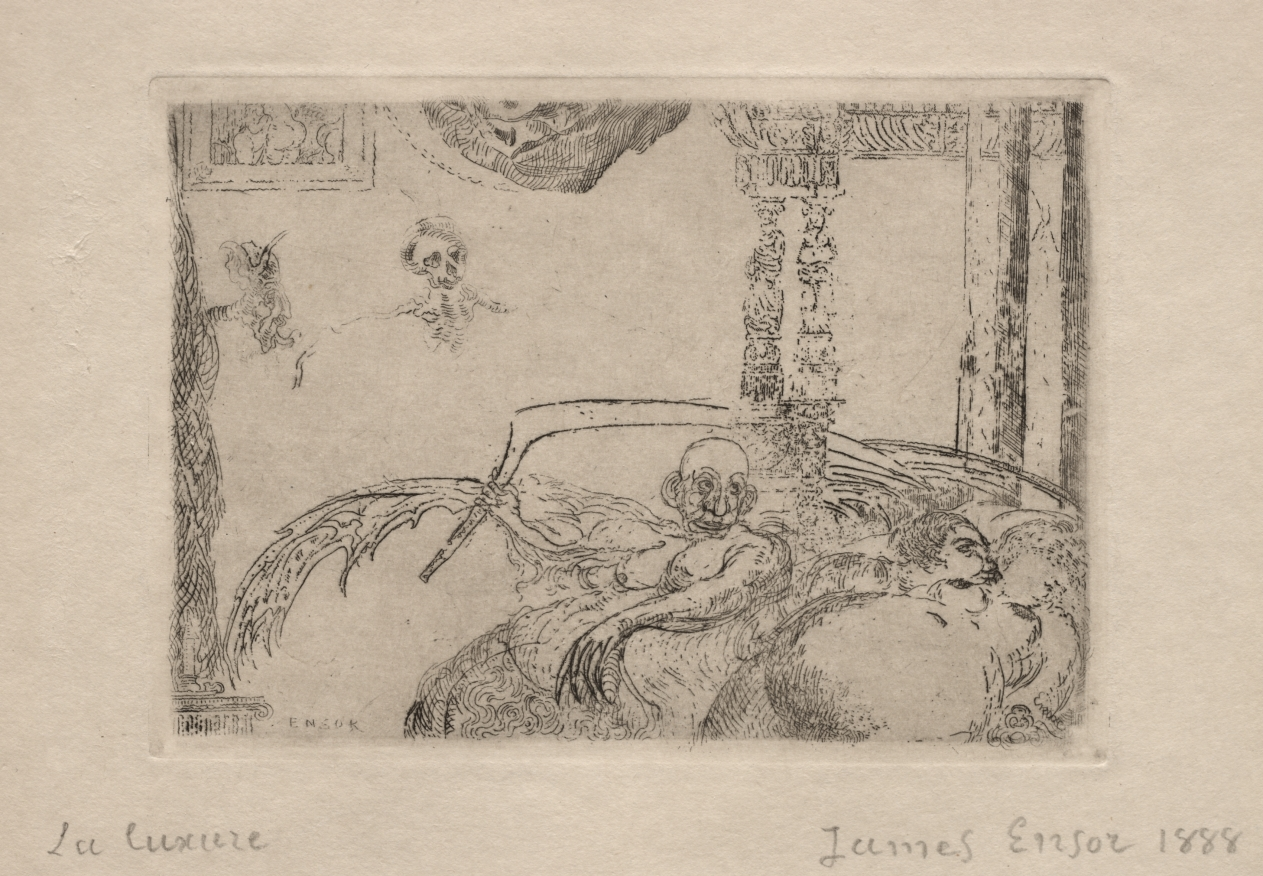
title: The Seven Deadly Sins: Lust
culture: Belgium, 19th-20th Century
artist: James Ensor (Belgian, 1860–1949)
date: 1888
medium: etching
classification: Print